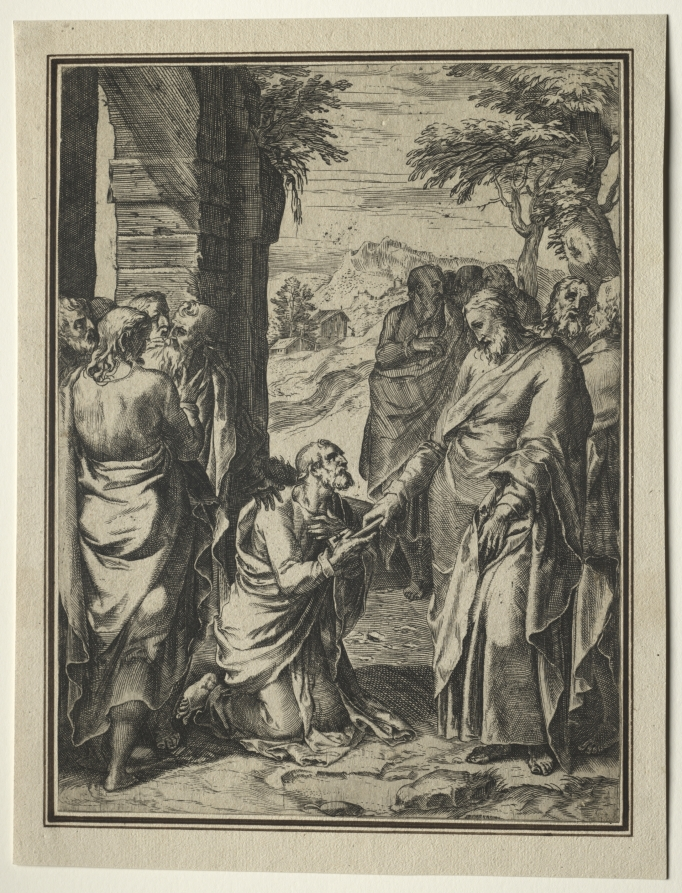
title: Copy of Cornelis Cort: Christ Giving the Key of the Church to Saint Peter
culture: Netherlands (?), 16th century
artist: Anonymous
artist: after Girolamo Muziano (Italian, 1528/32–1592)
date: c. 1567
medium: etching and engraving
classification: Print